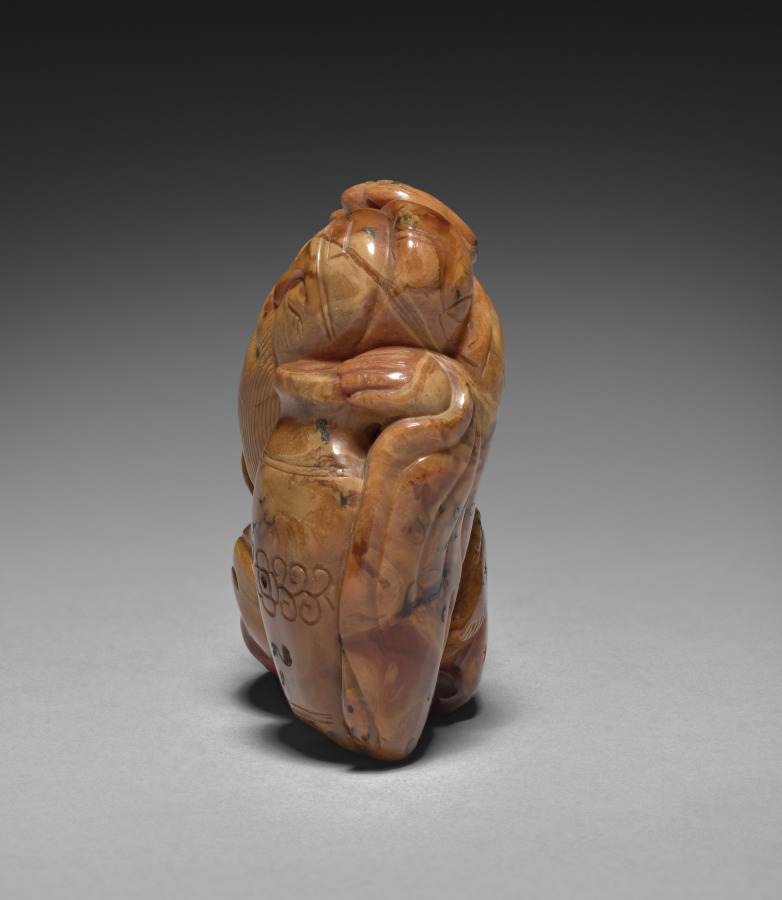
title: Li Taibo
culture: China, Qing dynasty (1644-1911)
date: 1700s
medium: amber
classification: Stone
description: This piece of ochre amber is carved in the round in the form of Li Bai 李白 (701–762), also known as Li Taibai or Li Taibo, 李太白. He was a poet in the golden age of Chinese poetry. Around a thousand poems are attributed to him. Li’s eyes are closed, an arm wrapped around his wine jar, in a drunken sleep. Perched on his shoulder is a bat, considered a lucky symbol as the Chinese word for bat, 蝠 fú, is pronounced the same as “good fortune” 福. Deer, like the one nestled behind Li, traditionally symbolize longevity and prosperity. These auspicious symbols create a bittersweet contrast with the legendary story that Li drowned while drunk when reaching to grasp the moon's reflection in the river.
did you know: Li Bai was one of the Eight Immortals of the Wine Cup, Tang dynasty scholars who enjoyed drinking alcohol.